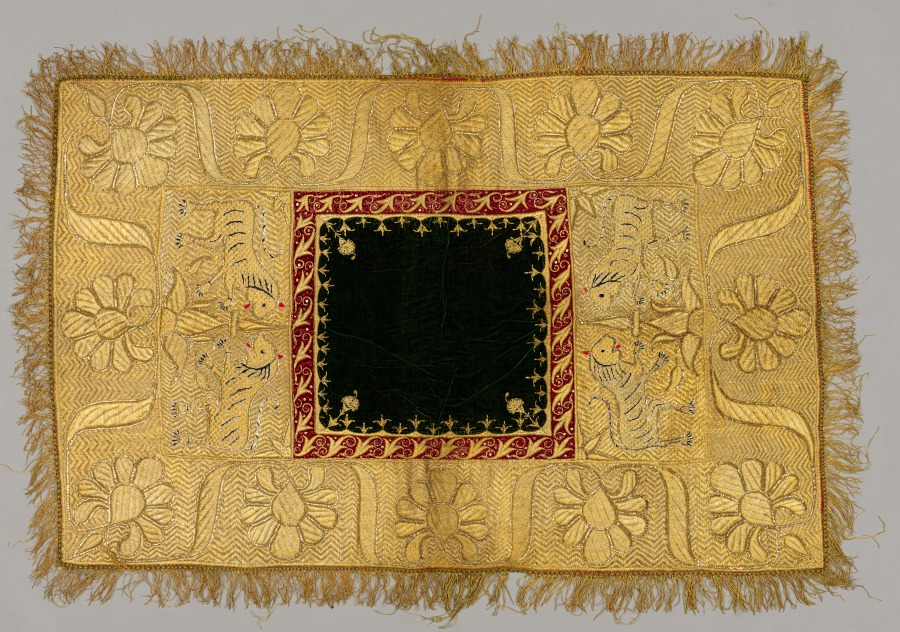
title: Embroidered Cover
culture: India, 19th century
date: 1800s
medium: embroidery: silk, metal, and cotton thread on cotton ground; silk edging and velvet appliqué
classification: Embroidery